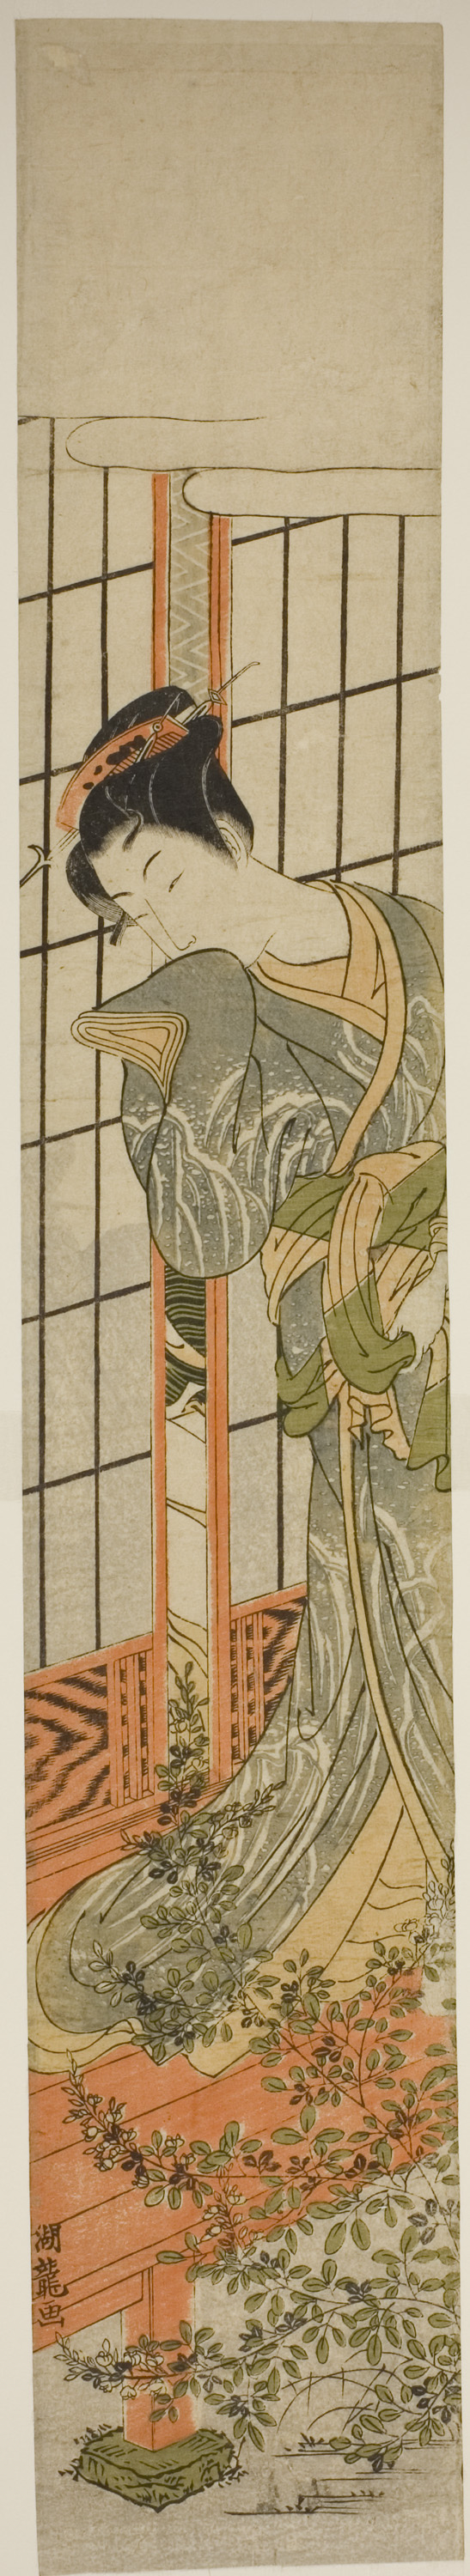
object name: Print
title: Eavesdropping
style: Japanese (culture or style)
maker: Isoda Koryusai (Japanese, 1735-1790)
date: c. 1773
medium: Color woodblock print; hashira-e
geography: Japan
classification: woodblock print; print; asian art